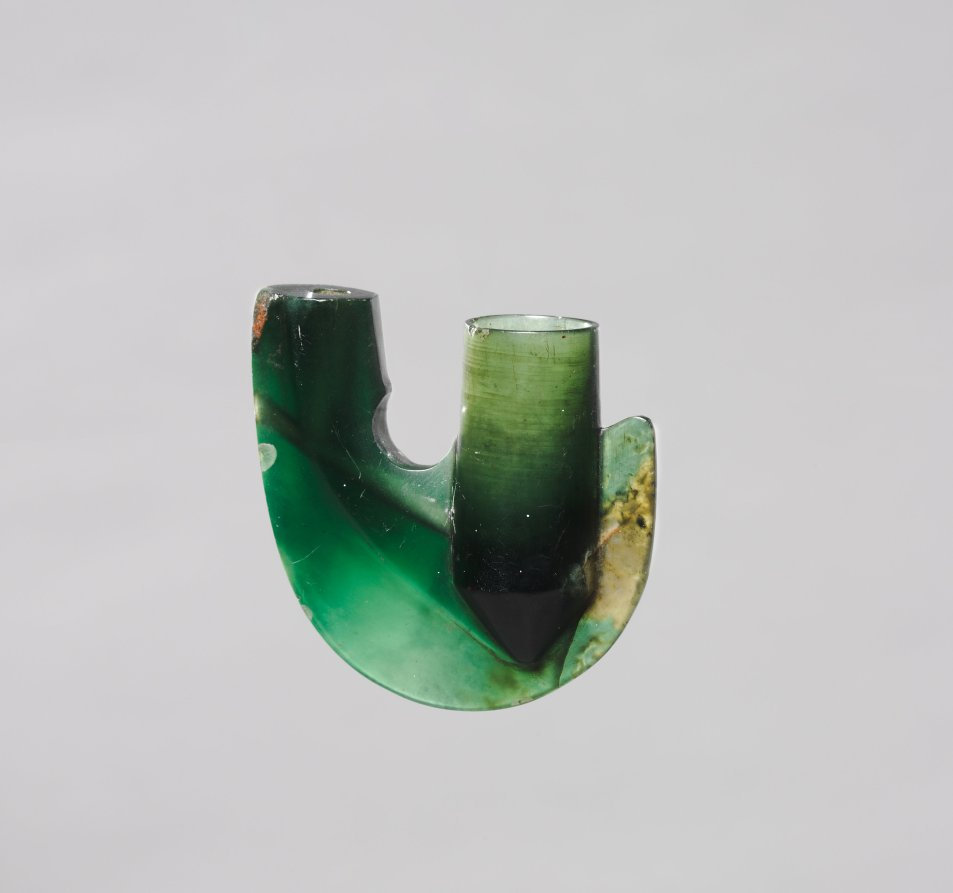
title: Pipe Bowl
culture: Africa, Southern Africa, South Africa, Southern Nguni-style maker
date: possibly 1800s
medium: Nephrite and metal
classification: Implements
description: Carved from a deep green, translucent stone with a highly polished surface, this exquisite example of an extremely rare type of pipe bowl originates from the Eastern Cape Province in South Africa. Like the few other known examples, this pipe bowl would have been complemented by a stem, now lost, made from wood or reed or another less durable material. It is believed that such nephrite pipe bowls were copied from stone examples introduced by 17th-century Dutch settlers in the Cape region. In southern Africa, smoking tobacco and taking snuff were and still are enjoyed as activities that establish or solidify harmonious social relationships. In addition to their practical function as smoking devices, pipes of unusual and therefore costly materials and in fancy and refined shapes and forms, like this example, served as markers of rank and status and indicated prestige and socioeconomic prominence.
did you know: This object is made of nephrite, one of two different mineral species called jade; the other is jadeite.